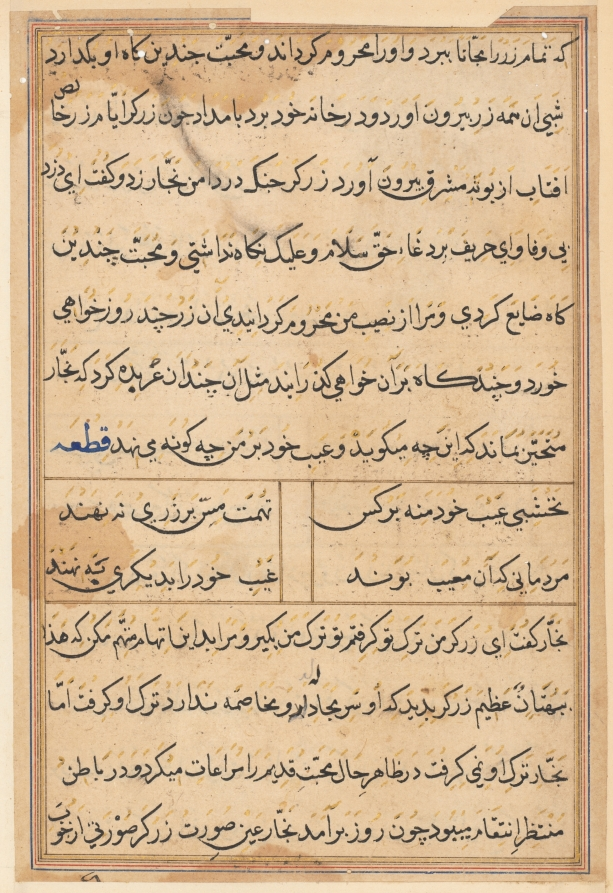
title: Page from Tales of a Parrot (Tuti-nama): text page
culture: Mughal India, court of Akbar (reigned 1556–1605)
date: c. 1560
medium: gum tempera, ink, and gold on paper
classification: Painting